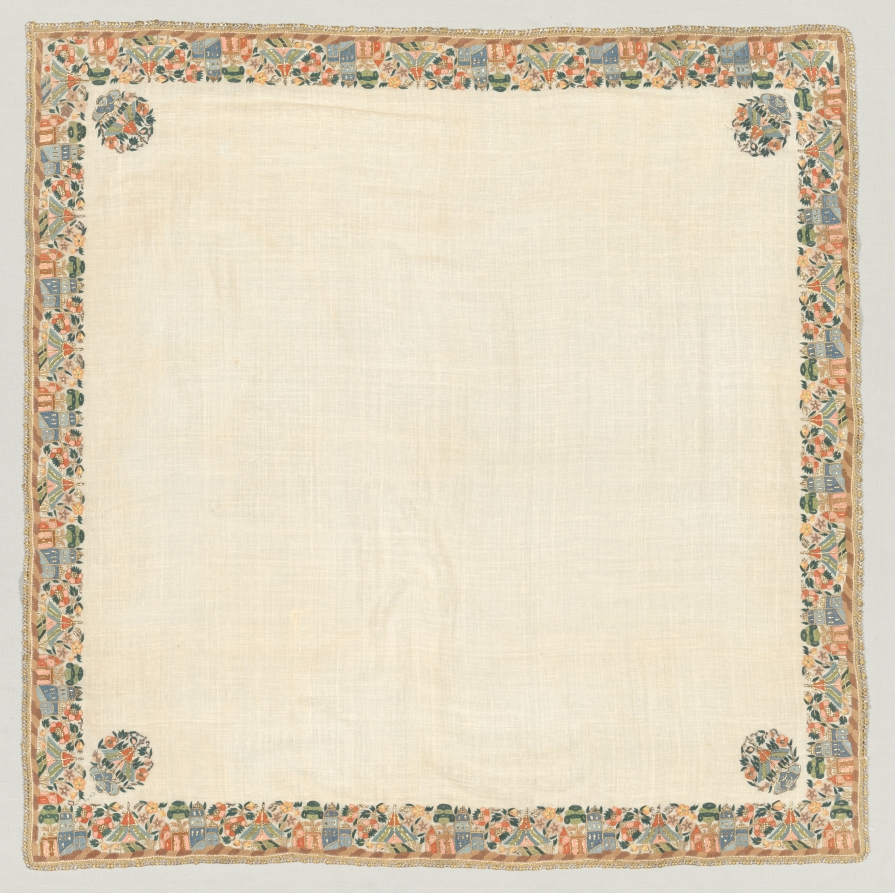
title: Embroidered head scarf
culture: Turkey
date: 1800s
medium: plain weave: linen; embroidery, double-running stitch: silk, gilt-metal strips and thread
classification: Embroidery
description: The edges of this headscarf are embroidered with landscape: a mosque alternates with a Turkish tent with a flowering plant between. In each corner is a medallion formed by a flowering plant surrounding a Turkish tent.